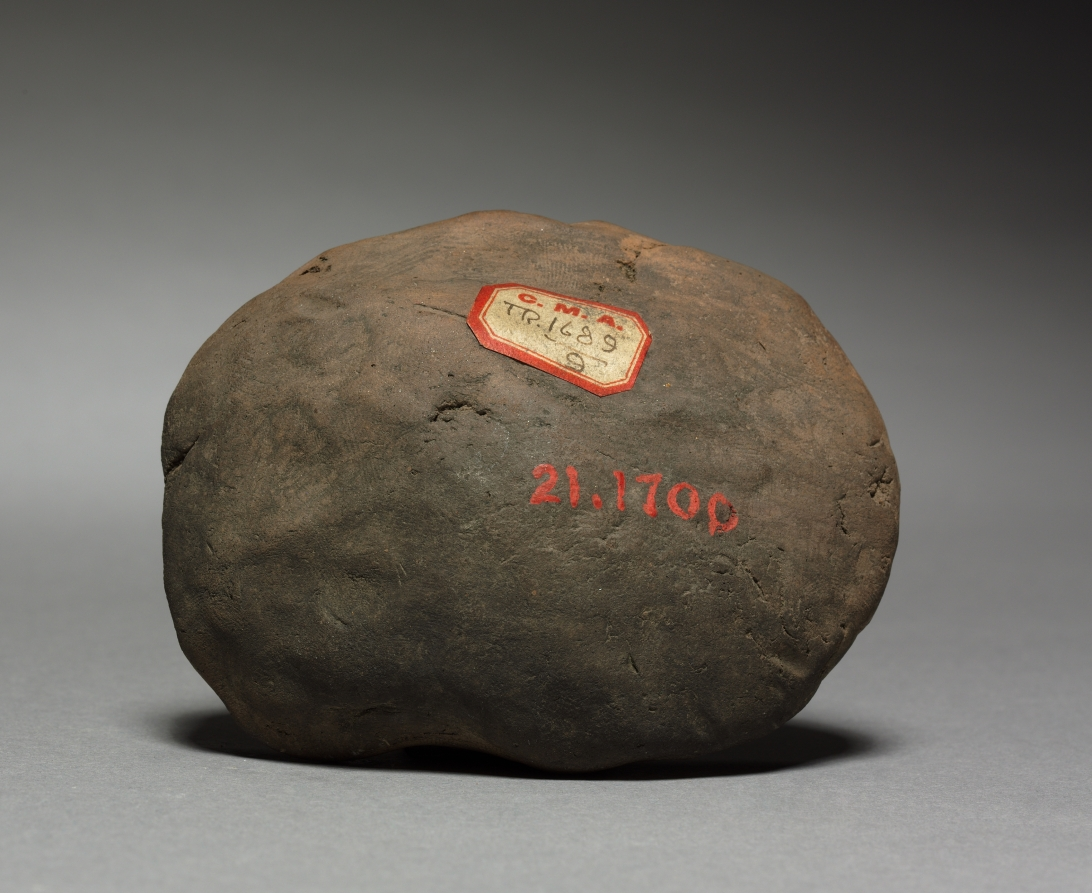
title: Mold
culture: Mexico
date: 1–1500 CE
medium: pottery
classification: Ceramic